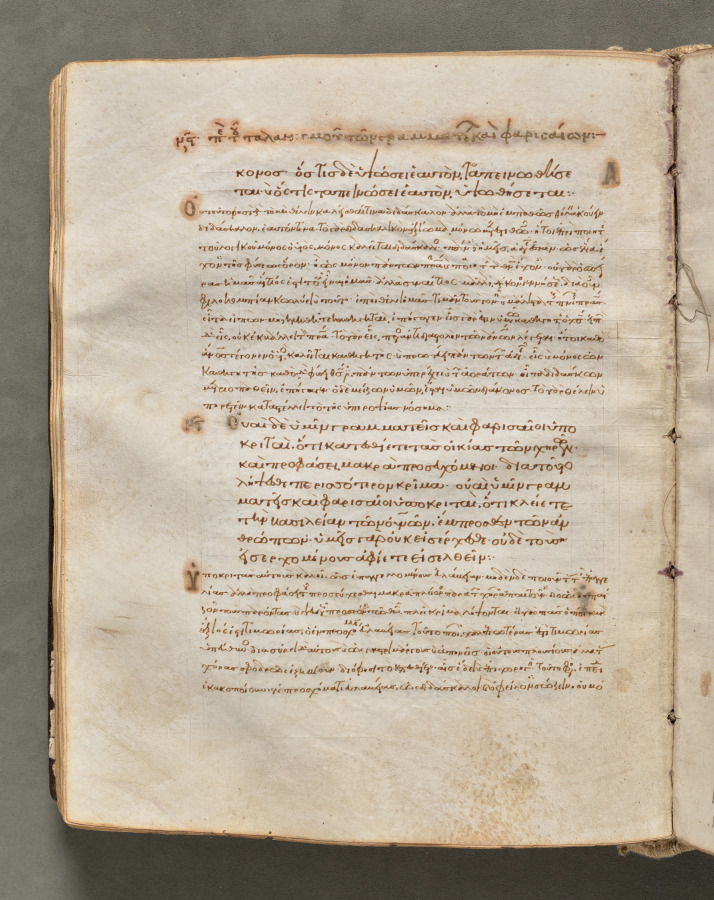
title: Text, folio 101 (verso), from a Gospel Book with Commentaries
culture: Byzantium, Constantinople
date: c. 1000–1100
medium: ink, tempera, and gold on vellum; leather binding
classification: Bound Volume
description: Each of the four gospels in this book opens on a page with brilliantly illuminated borders depicting the author of the text as well as birds-principally peacocks, symbols of the immortality of the soul-and fountains, representing the fountain of life and the salvation of the soul. This volume consists of 428 leaves with texts in Greek. Its level of sophistication suggests that it was probably written and decorated in a monastery in Constantinople.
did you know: Gospel Books were carried in procession through Byzantine churches.